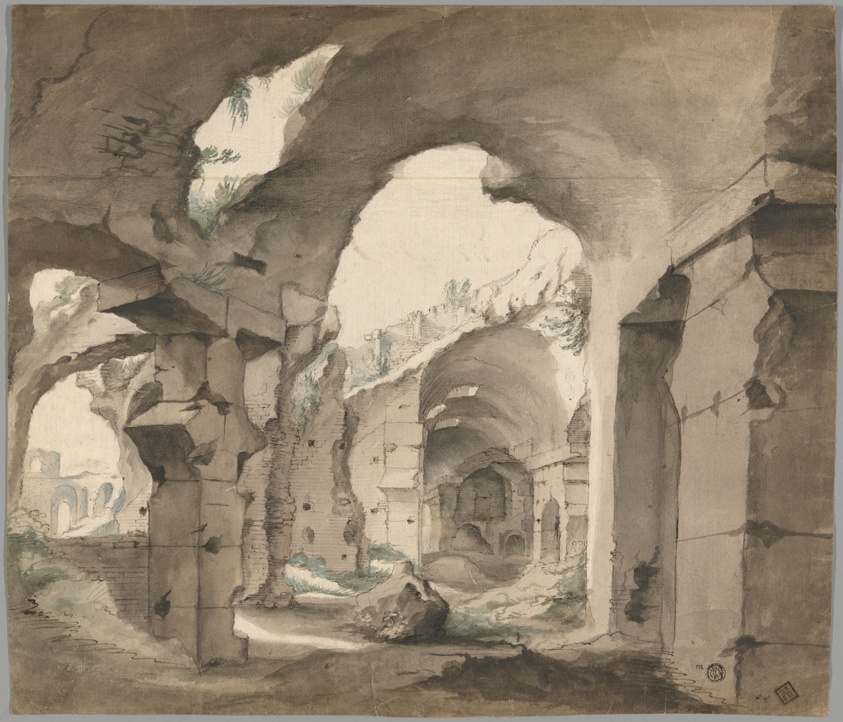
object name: Drawing and Watercolor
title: Interior View of the Coliseum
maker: Attributed to Lodewijk Toeput; Flemish, c. 1550–c. 1605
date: c. 1580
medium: Pen and brown ink and brush and black and green washes, over black chalk, on cream laid paper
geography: Flanders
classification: ink or chalk wash; drawings (visual works); prints and drawing